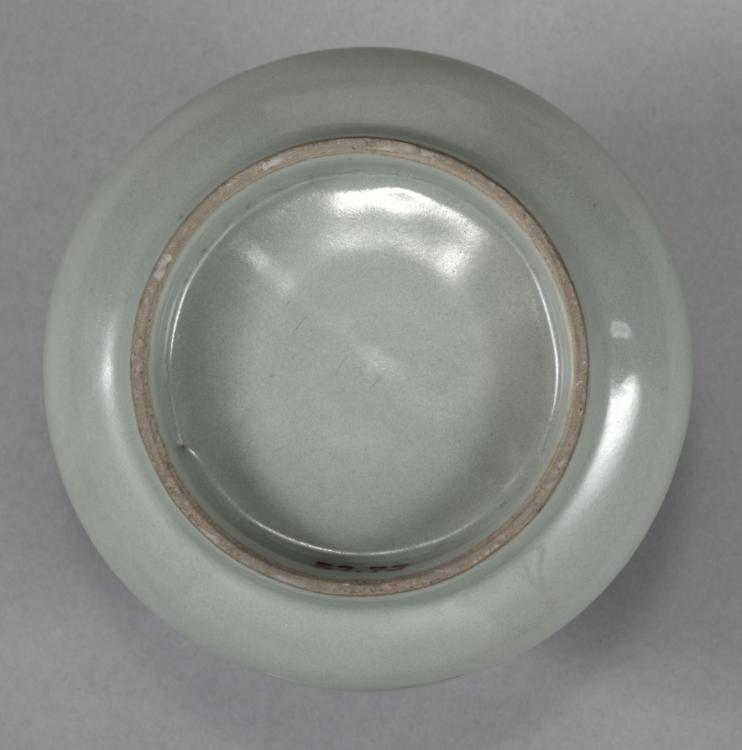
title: Vase in the Shape of a Grain Measure (Zhadou)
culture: China, Zhejiang province, Longquan region, Southern Song dynasty (1127-1279)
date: 1127–1279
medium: green-glazed porcelaneous stoneware, Longquan ware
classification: Ceramic